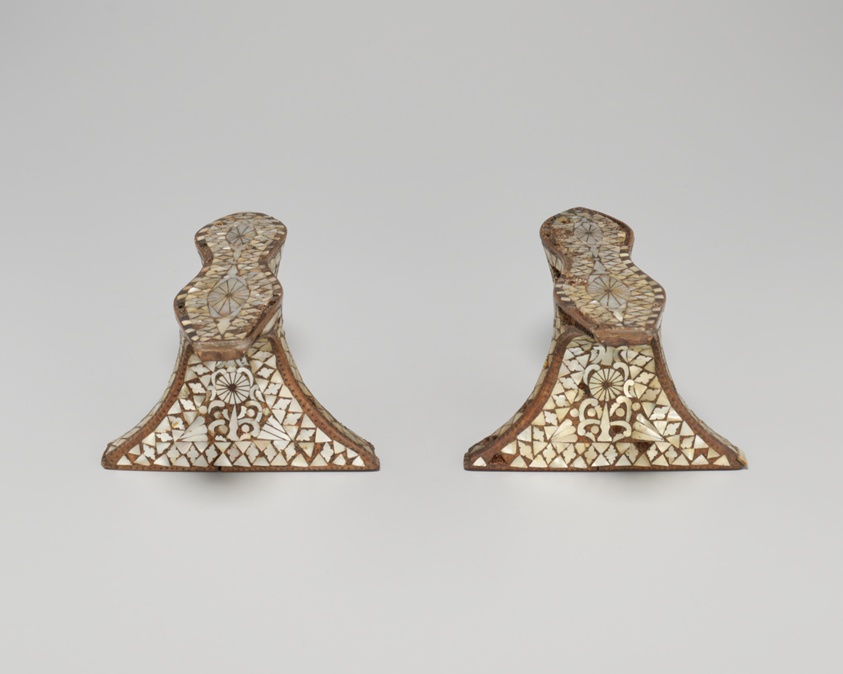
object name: Textile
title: Pair of Clogs (Qabqab)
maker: Algeria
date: Mid–19th century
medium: Wood inlaid with mother of pearl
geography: Algeria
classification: textile; costume accessory - shoe; shoes - misc; costume; dress (garment); clothing